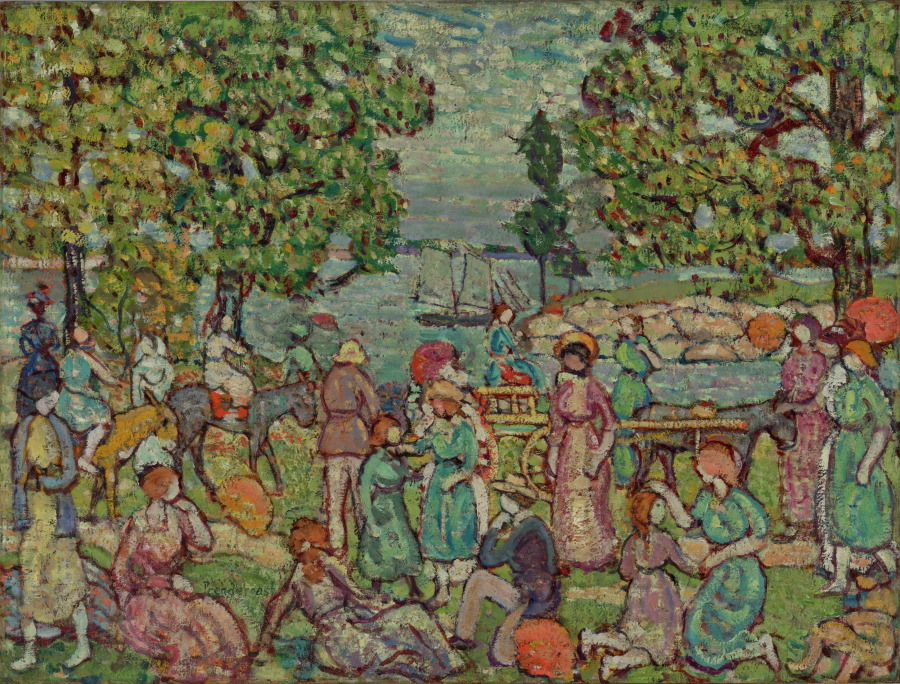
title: On the Beach, No. 3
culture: America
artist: Maurice Prendergast (American, born Newfoundland [now Canada], 1858–1924)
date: c. 1915–18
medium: oil on canvas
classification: Painting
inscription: signed lower left: Prendergast; annotated on verso, "The Beach."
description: Prendergast developed a distinctive painting style featuring rounded patches of thickly applied color. Like many of his works, On the Beach, No. 3 visually approximates a densely woven tapestry.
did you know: Three modes of transportation appear in this composition: a ship, horse, and donkey cart.